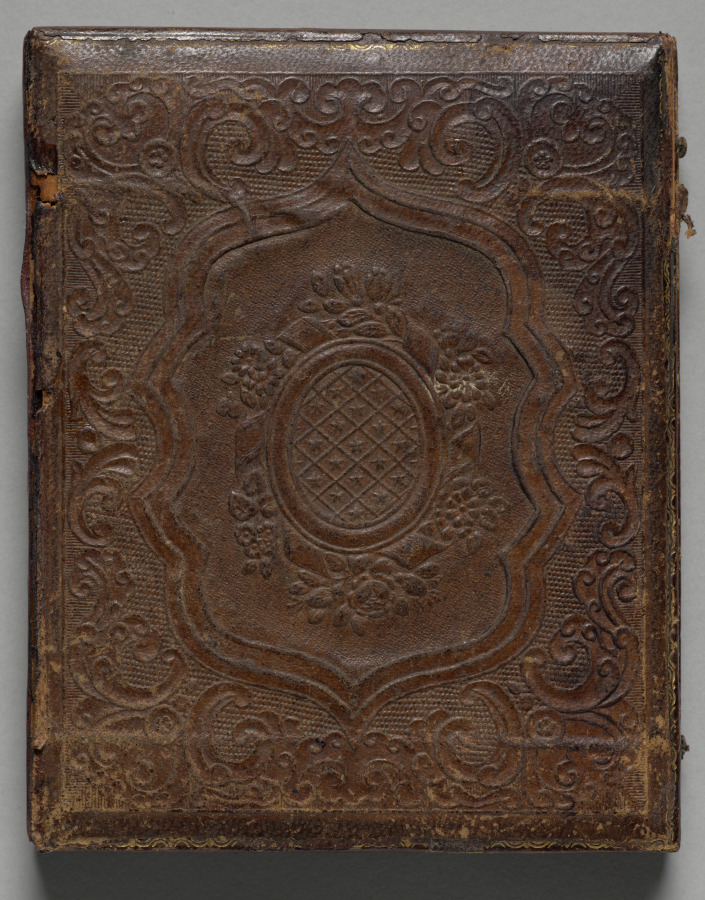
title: Homestead with picket fence and flowers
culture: America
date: c. 1857–65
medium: ambrotype, half plate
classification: Photograph